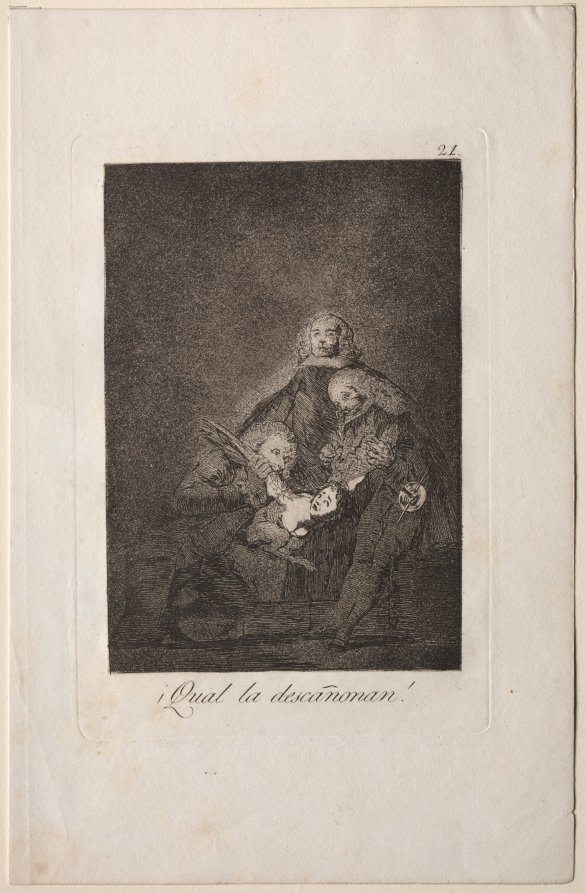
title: How They Pluck Her!, Plate 21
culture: Spain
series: Los Caprichos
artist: Francisco de Goya (Spanish, 1746–1828)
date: 1799 (printed c. 1855)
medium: etching and aquatint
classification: Print